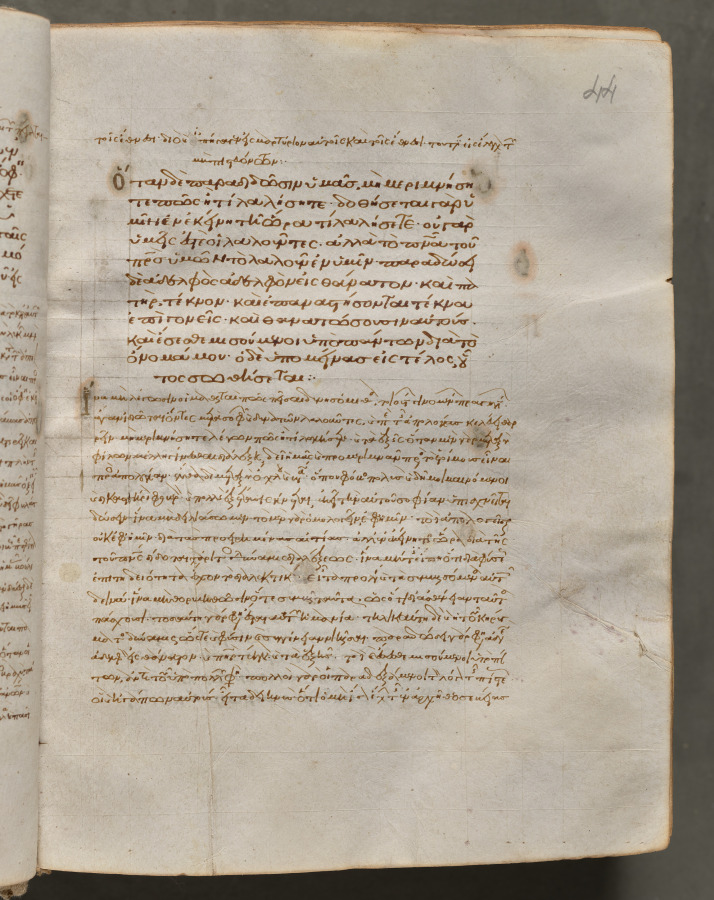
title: Text, folio 44 (recto), from a Gospel Book with Commentaries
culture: Byzantium, Constantinople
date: c. 1000–1100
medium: ink, tempera, and gold on vellum; leather binding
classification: Bound Volume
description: Each of the four gospels in this book opens on a page with brilliantly illuminated borders depicting the author of the text as well as birds-principally peacocks, symbols of the immortality of the soul-and fountains, representing the fountain of life and the salvation of the soul. This volume consists of 428 leaves with texts in Greek. Its level of sophistication suggests that it was probably written and decorated in a monastery in Constantinople.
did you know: Gospel Books were carried in procession through Byzantine churches.